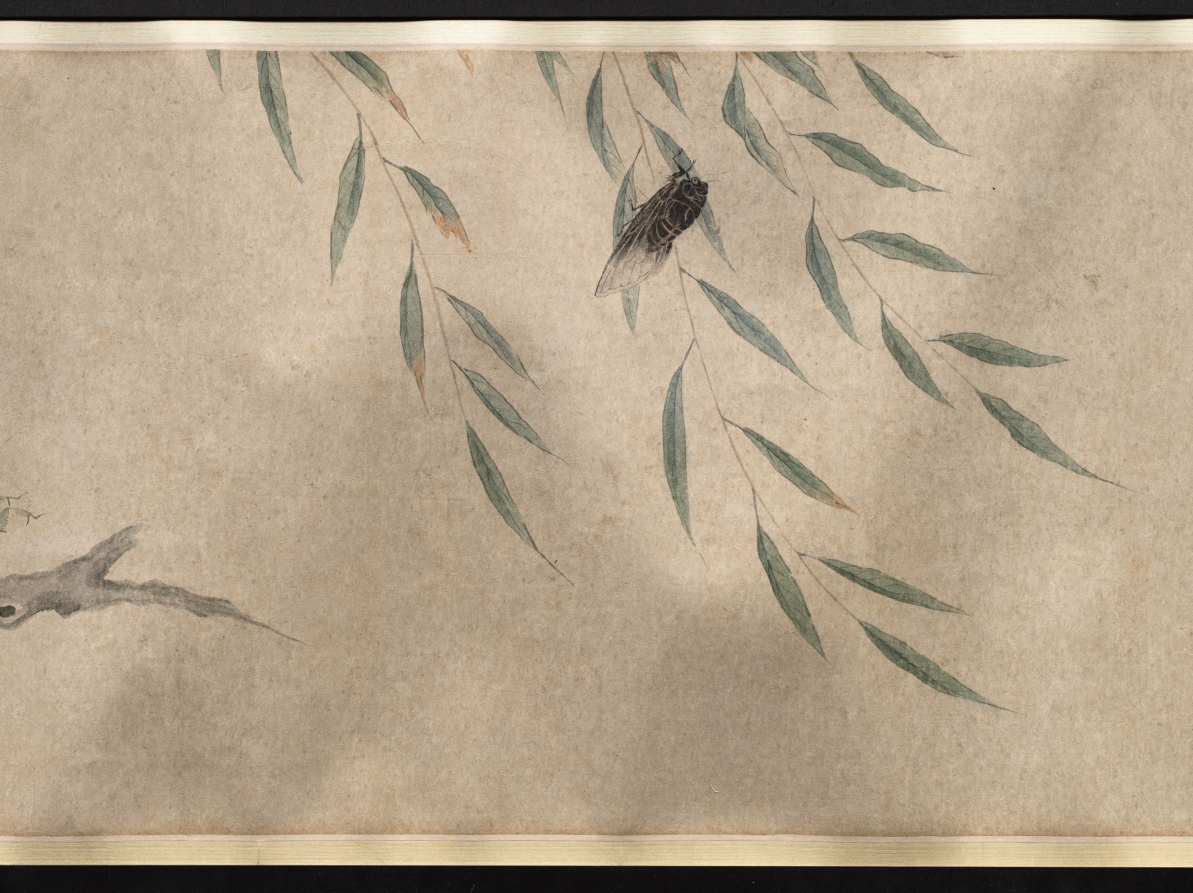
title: Insects and Flowers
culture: China, Qing dynasty (1644-1911) or Republican period (1912-49)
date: c. 1900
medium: Handscroll, ink and color on paper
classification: Painting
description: More than 26 feet long, this scroll presents insects, reptiles, and plants in delicate brushwork and pale colors, referring in style to earlier Southern Song dynasty (1127–1279) bird-and-flower paintings. Upon closer inspection, ants dismember a butterfly and reptiles wait to ambush their prey. An inscription at the end of the painting gives us an idea of its meaning: Attributed to the Qing dynasty scholar Zhang Xigeng (張錫庚, 1801–1861), the inscriber relates the work to an earlier painting by Qian Xuan (錢選, c. 1235–before 1307) and further suggests that the painting may allude to the relentlessness of natural selection. By drawing a parallel to tumultuous episodes in Chinese history, the writer might even hint at the domestic rebellions and the aggression of Western powers against China in his lifetime, particularly the Opium Wars (1839–60).